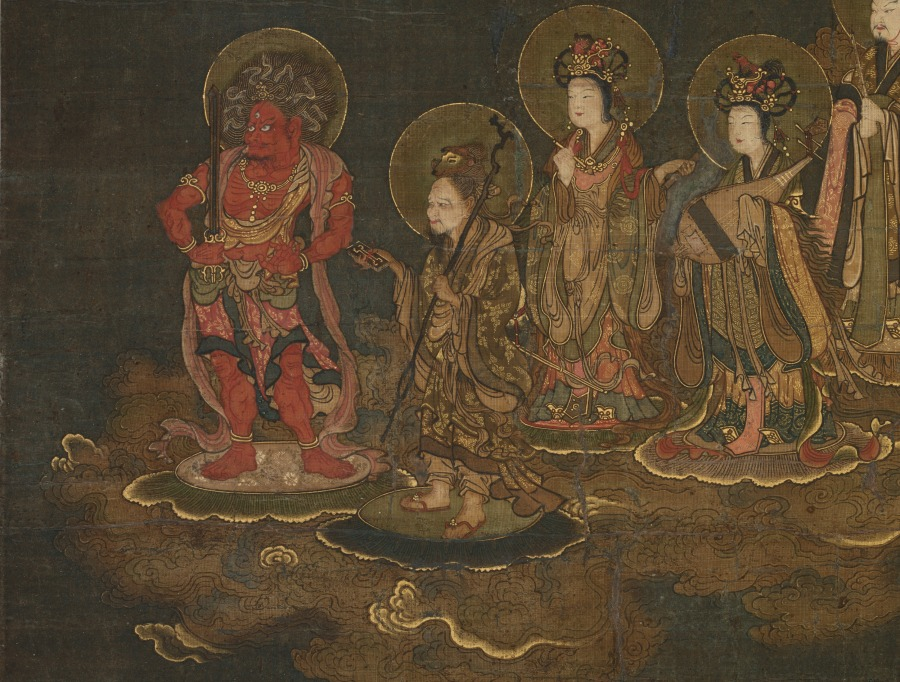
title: Descent of the Nine Luminaries and the Seven Stars at Kasuga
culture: Japan, Nanbokuchō period (1336–92)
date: mid- to late 1300s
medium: Hanging scroll; ink, color, gold and cut gold on silk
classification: Painting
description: This medieval religious painting shows celestial beings descending from the heavens into the Kasuga Shrine, a major religious site in Japan's ancient capital, Nara. The moon and the Kasuga mountain range appear in the uppermost portion of the painting, as does a red shrine entrance gate, or torii. In the upper part of the painting, figural representations of the stars in the constellation known as the Big Dipper in the West descend from right to left on cloud banks. In the lower part, the Nine Luminaries (Sanskrit: Navagraha) that emerged from the Vedic tradition—the sun and moon; the planets Jupiter, Mars, Saturn, Venus, and Mercury; and personifications of the fluctuating lunar nodes—descend in similar fashion. The painting uses the "deities in descent" scheme originating in China, as well as the original Buddhist form mandala (Japanese: honjibutsu mandarazu) format prevalent in medieval Japanese Shinto-Buddhist painting, to generate an image connected to the worship of celestial bodies in Esoteric Buddhism.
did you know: A 19th-century copy of this painting in ink and light color exists at the Kyoto City University of Arts.